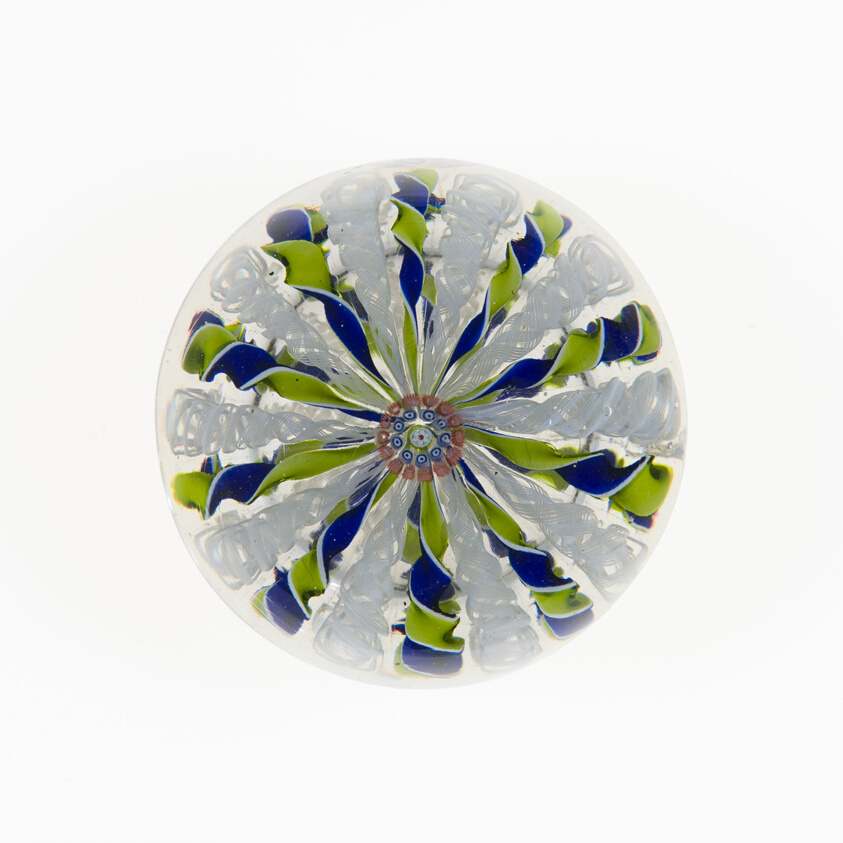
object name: Glass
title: Paperweight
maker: Saint-Louis Glassworks (Cristalleries de Saint-Louis); Lorraine, France, founded 1586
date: c. 1845–60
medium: Glass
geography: Saint-Louis-lès-Bitche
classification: paperweight; glass